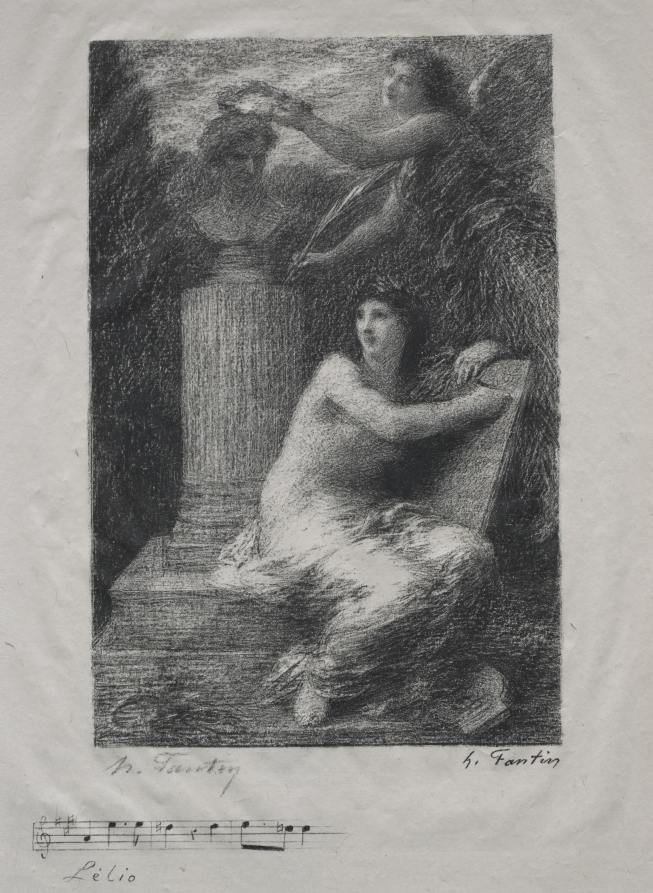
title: To Berlioz (Small Plate)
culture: France, 19th century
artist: Henri Fantin-Latour (French, 1836–1904)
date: 1895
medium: lithograph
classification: Print